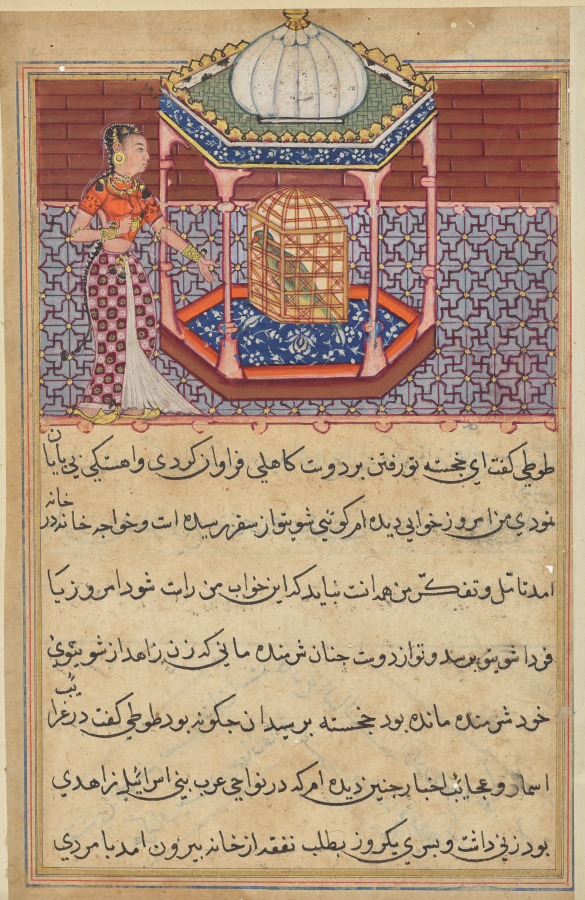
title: The parrot addresses Khujasta at the beginning of the fifty-second night, from a Tuti-nama (Tales of a Parrot): Fifty-second Night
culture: Mughal India, court of Akbar (reigned 1556–1605)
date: c. 1560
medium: gum tempera, ink, and gold on paper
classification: Painting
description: On the final night of the Tuti-nama, Khujasta asks Tuti the parrot if she can leave to visit her lover. As the story ends, Khujasta’s husband, Maymun, returns home from his journey. Her affair is revealed, and she is ultimately killed. Maymun shaves his head, dons the robes of an ascetic, and enters a hermitage.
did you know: Tuti is telling Khujasta a story about how the son of a pious man became a king.